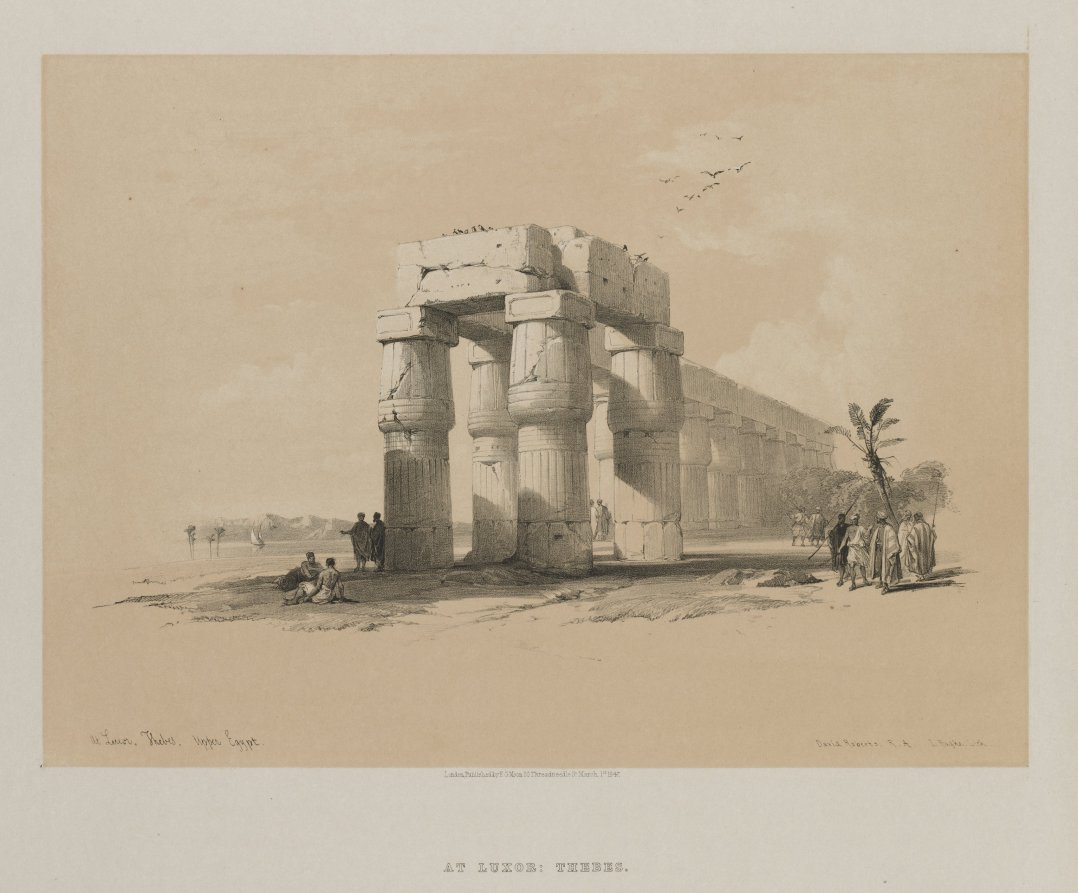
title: Egypt and Nubia, Volume I: At Luxor, Thebes, Upper Egypt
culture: England, 19th century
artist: Louis Haghe (British, 1806–1885)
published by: F. G. Moon, 20 Threadneedle Street, London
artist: after David Roberts (Scottish, 1796–1864)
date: 1847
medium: color lithograph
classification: Print